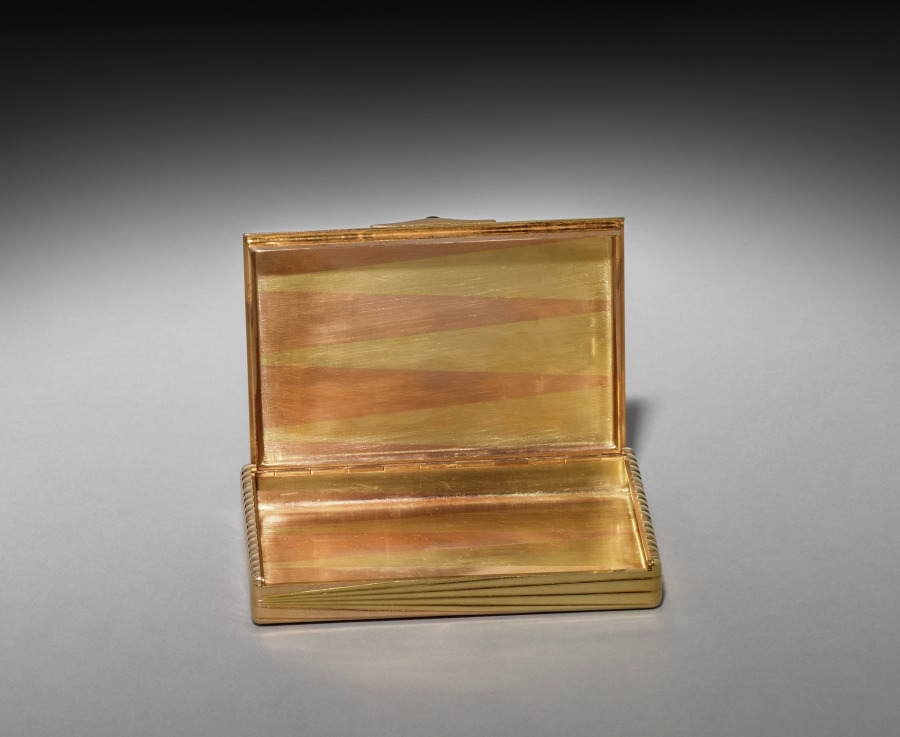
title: Cigarette Case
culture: Russia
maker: House of Fabergé (Russian, 1842–1918)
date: c. 1908–17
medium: gold, sapphire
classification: Silver